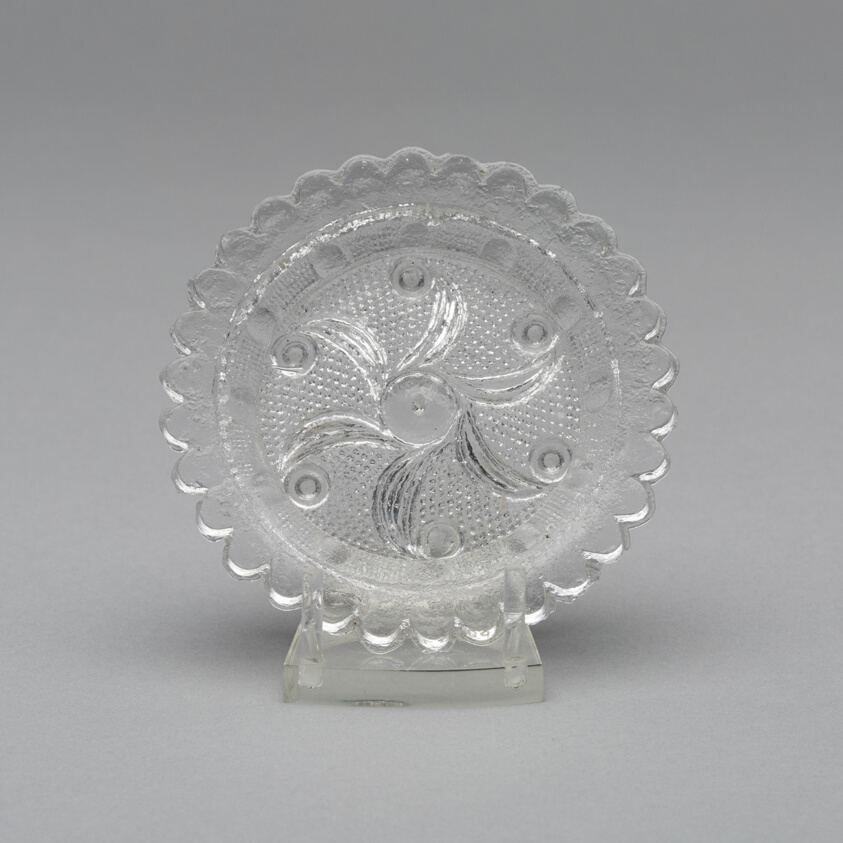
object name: Glass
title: Cup plate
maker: Artist unknown (American, 19th century); Probably Pittsburgh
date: c. 1830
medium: Pressed glass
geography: Pittsburgh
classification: plate (general, dish); glass; american decorative arts; american arts; decorative arts